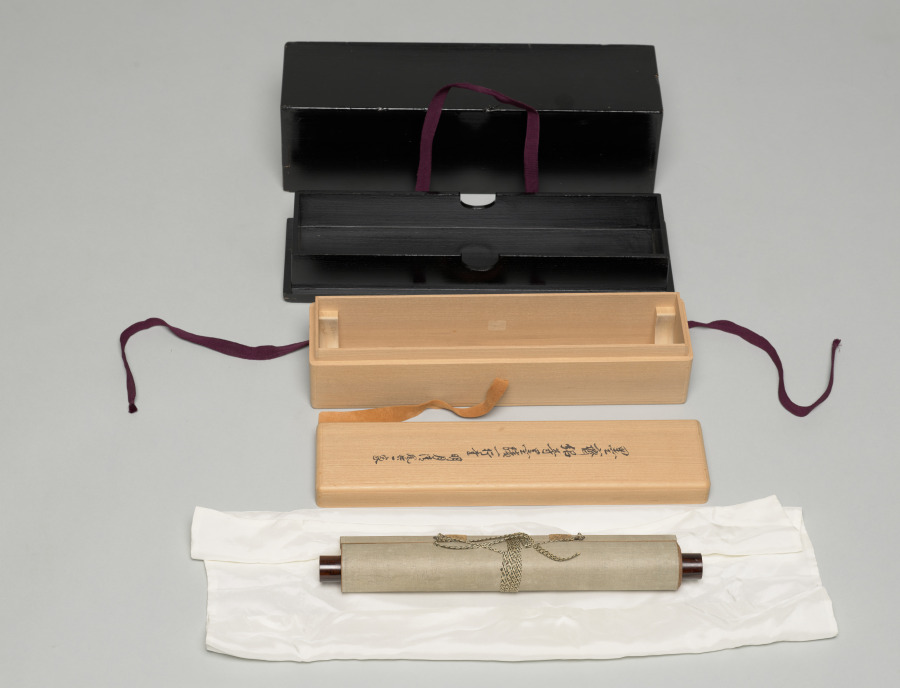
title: Single-column Calligraphy (Bright Moon and Fresh Breath as One . . . )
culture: Japan, Muromachi period (1392–1573)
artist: Motsurin Jōtō (Japanese, d. 1492)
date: 1400s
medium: hanging scroll; ink on paper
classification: Calligraphy